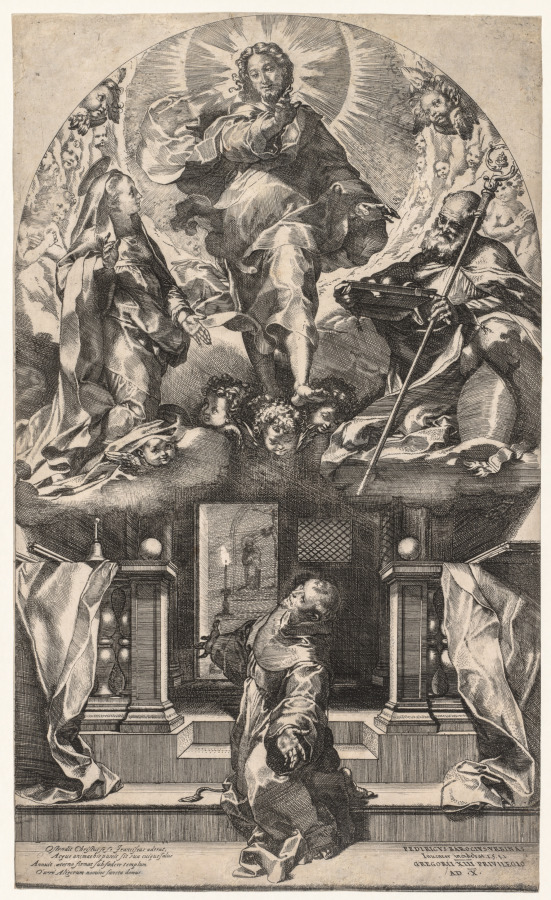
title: The Vision of St. Francis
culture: Italy, Baroque period, 16th Century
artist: Federico Barocci (Italian, 1528–1612)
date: 1581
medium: etching and engraving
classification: Print